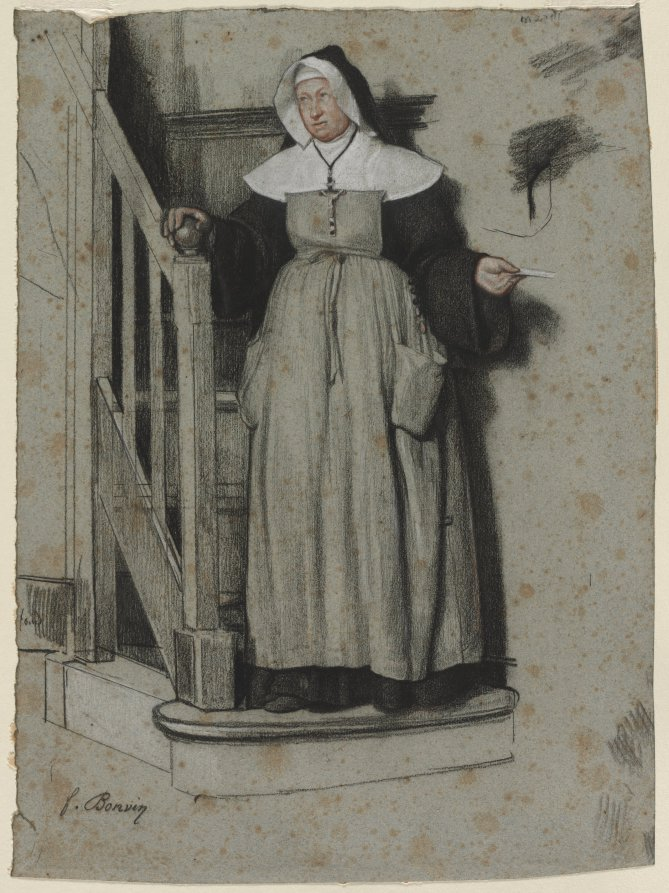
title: The Letter of Admission, Interior of a Convent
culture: France, 19th century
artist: François Bonvin (French, 1817–1887)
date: c. 1867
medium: black, white, and red crayon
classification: Drawing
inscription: signed, lower left, in black crayon: f. Bonvin